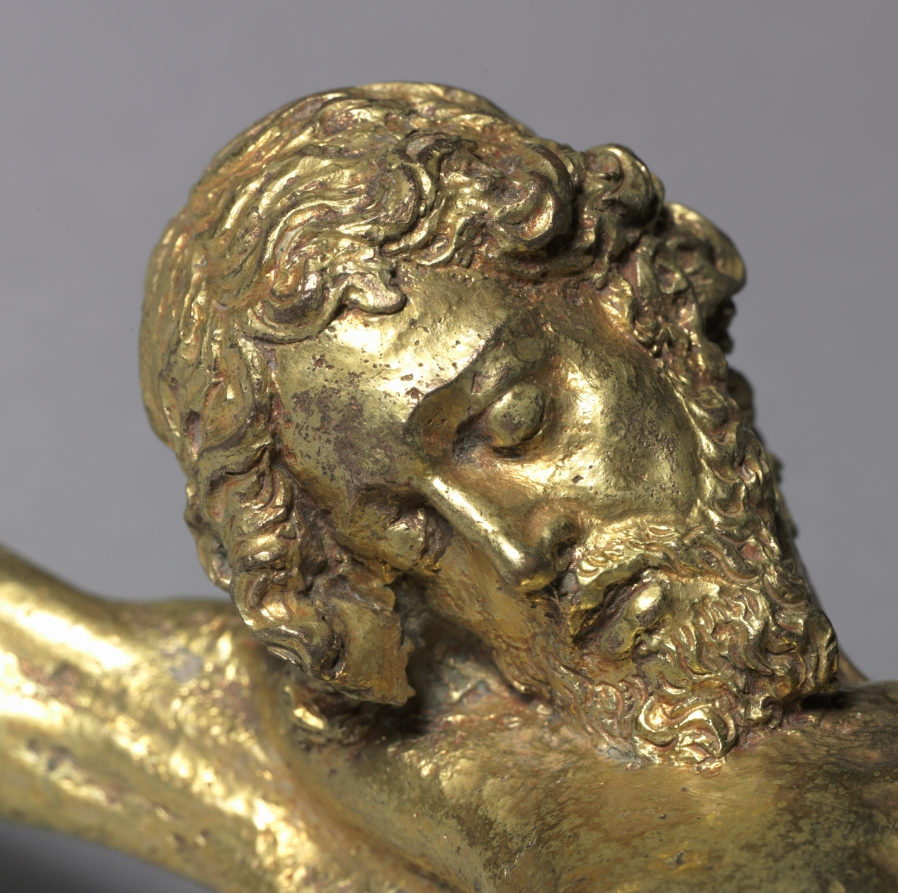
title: Crucified Christ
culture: Italy, 17th or 18th century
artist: cast after a model by Giambologna (Flemish, active Italy, 1529–1608)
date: 1600s or 1700s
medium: bronze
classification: Sculpture